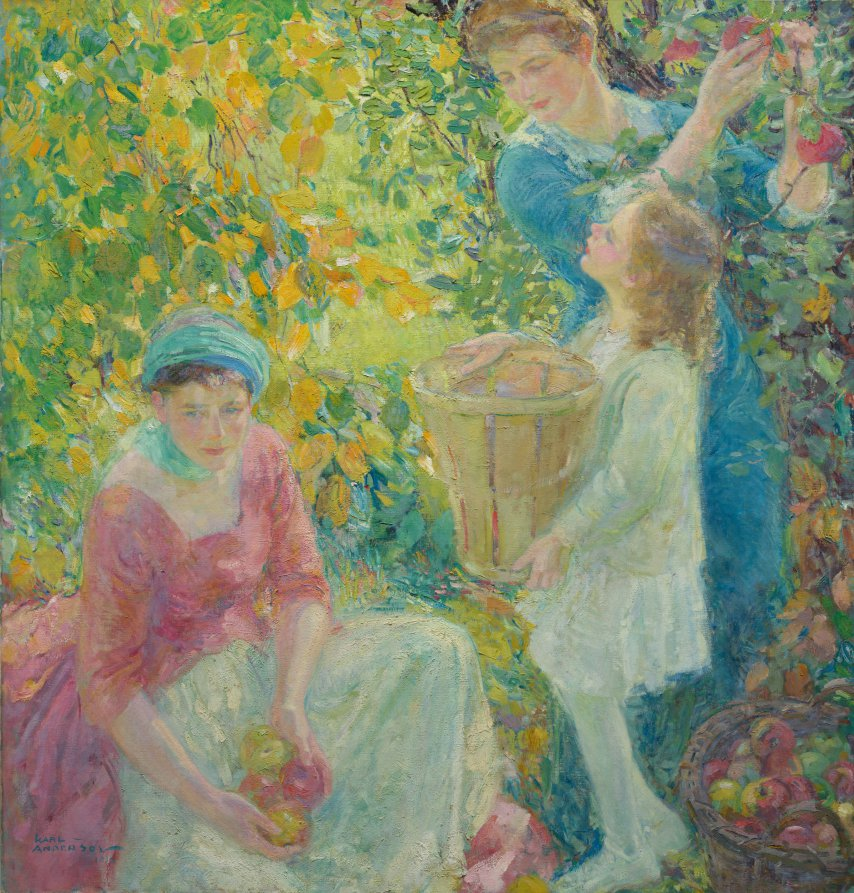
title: The Apple Gatherers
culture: America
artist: Karl Anderson (American, 1874–1956)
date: 1912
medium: oil on canvas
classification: Painting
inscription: Signed lower left: KARL/ANDERSON/1912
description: Karl Anderson disliked the industrialized cities of his day and opted to paint rural settings seemingly untouched by modern development. The leisurely activity of apple picking contrasts with demanding work in urban factories, and the young girl dressed in all white may represent idealized innocence. The artist stated that his paintings were meant to capture “the fragrance of the beauty of life.”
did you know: The apple variety depicted in this painting is the McIntosh, which today accounts for two-thirds of New England’s annual apple harvest.